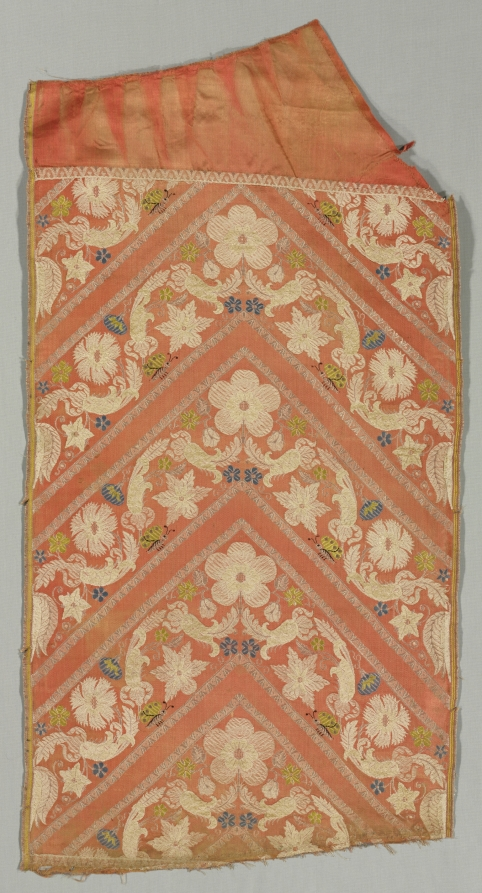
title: Silk Fragment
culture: Spain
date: 1700s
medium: plain compound satin, brocaded: silk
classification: Textile